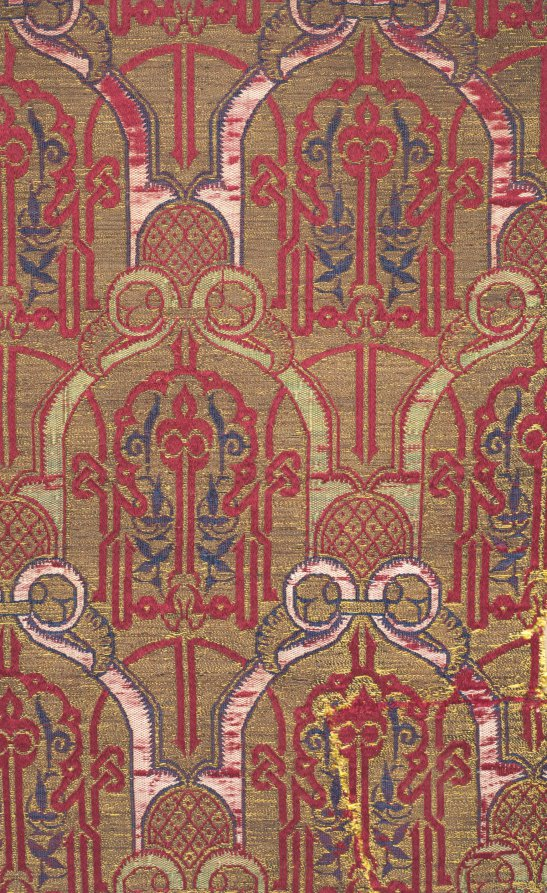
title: Fragment with palmette arches with Alhambra wall pattern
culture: Spain, Granada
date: 1300s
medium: Silk and gilt-metal thread: lampas weave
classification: Textile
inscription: horizontal rows of staggered arch-like forms enclose knotted and interlaced Kufic inscriptions: "Success."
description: This rare, gold-thread silk displays a sophisticated pattern that also decorates the stucco walls of the Alhambra, the imperial palace in Granada. Three superimposed designs form the harmonious pattern on the golden ground. Split-palmette leaves in ivory or green silk form staggered arches displaying a crimson text, Good fortune, written in angular Arabic script with extended strokes that create secondary symmetrical arches. Deep blue palmette leaves create the third level of decoration. The interior walls of the Alhambra would have shimmered with these warm, patterned textiles.